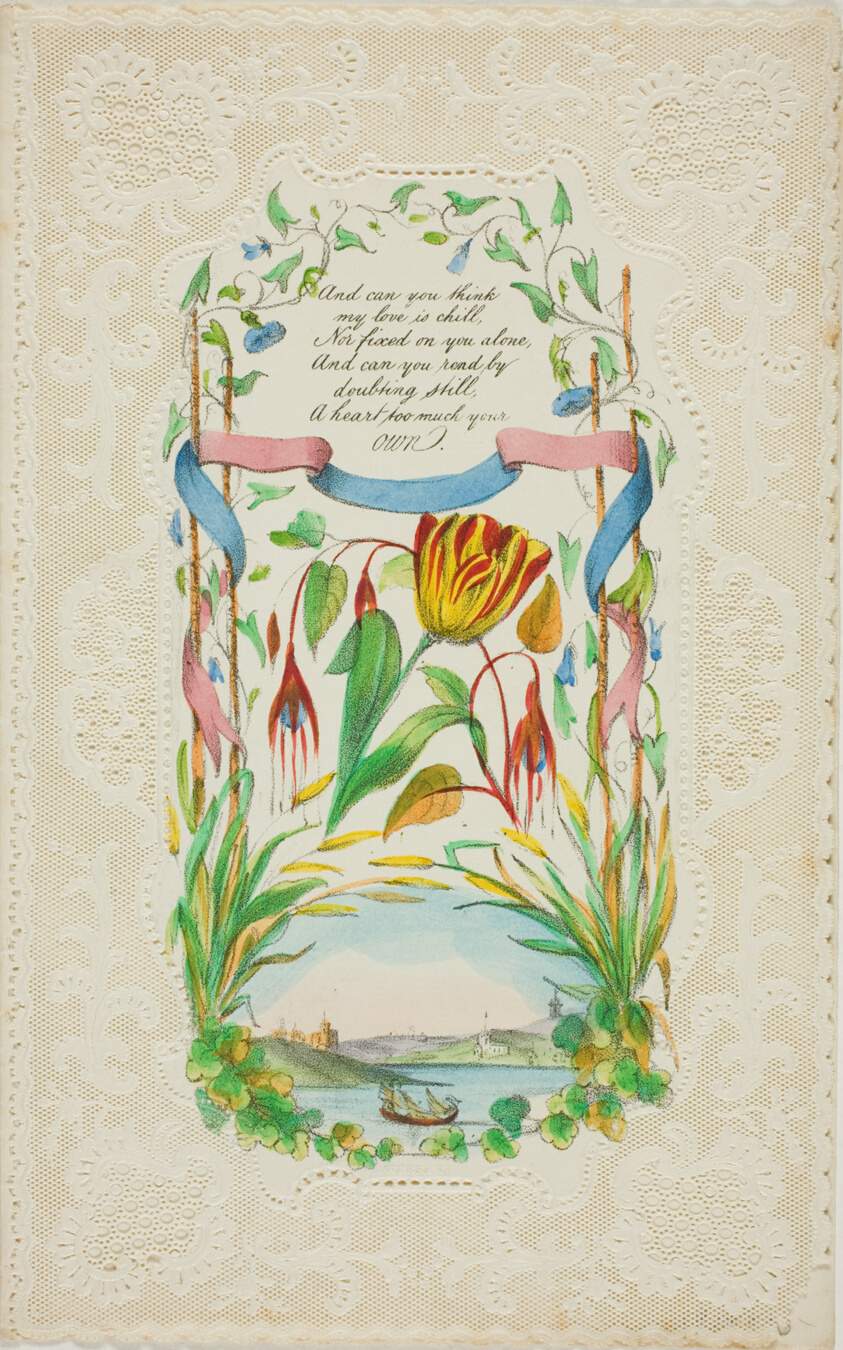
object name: Print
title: And Can You Think (valentine)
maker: George Kershaw (English, 19th century)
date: c. 1850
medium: Lithograph wth hand-coloring on cut and embossed ivory laid paper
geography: England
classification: valentine; prints and drawing; print